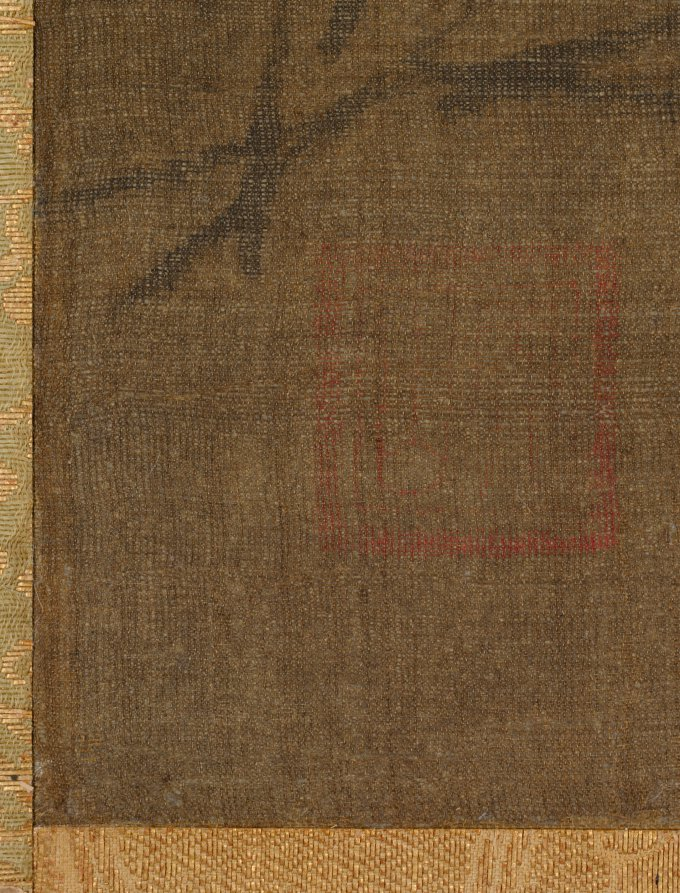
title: Tiger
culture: China, Southern Song dynasty (1127-1279)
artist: Fachang Muqi (Chinese, 1220–1280)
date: c. 1250–79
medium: Hanging scroll; ink and slight color on silk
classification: Painting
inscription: 道有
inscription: 雜華室印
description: The dragon and tiger are tied to the philosophical concept of yin and yang, which describes opposite but complementary forces. The dragon occupies a tiered background of waves and mist. Its luminous head emerges from the darker passages, and its narrow twisting body is serpent-like. By contrast, the close-up view of the tiger emphasizes its bulk. The tiger bends its head to lick its paw while its tail curls in the foreground. In their original Chan Buddhist context, this pair of scrolls likely flanked a central image, like the Bodhisattva Guanyin. The silk has darkened over the centuries, and the slight reddish shading in the tiger’s tongue and nose has faded.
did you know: Fachang Muqi's ink paintings, like this pair, were highly appreciated and collected in Japan.